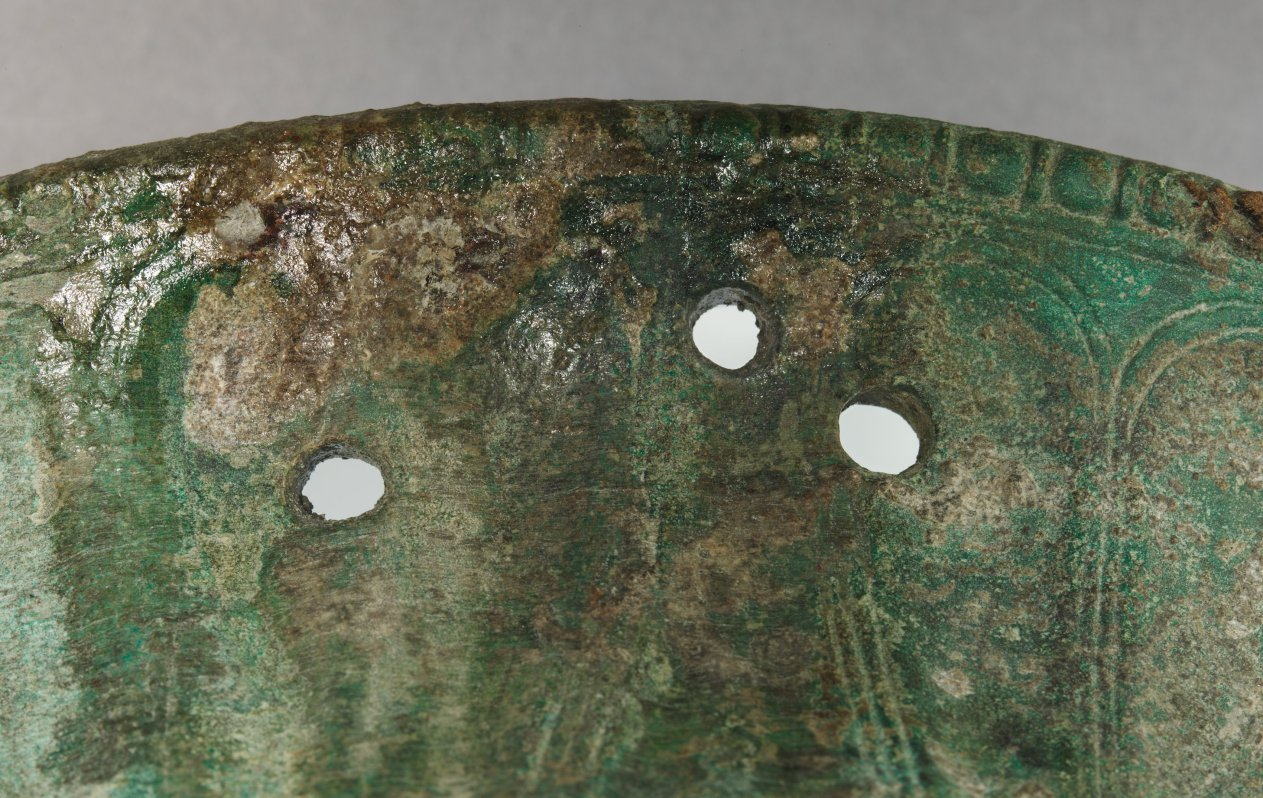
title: Bronze Volute Krater Base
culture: Greece, Laconia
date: late 600s BCE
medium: bronze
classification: Metalwork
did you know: This object supported a large vessel used for mixing wine with water called a krater.